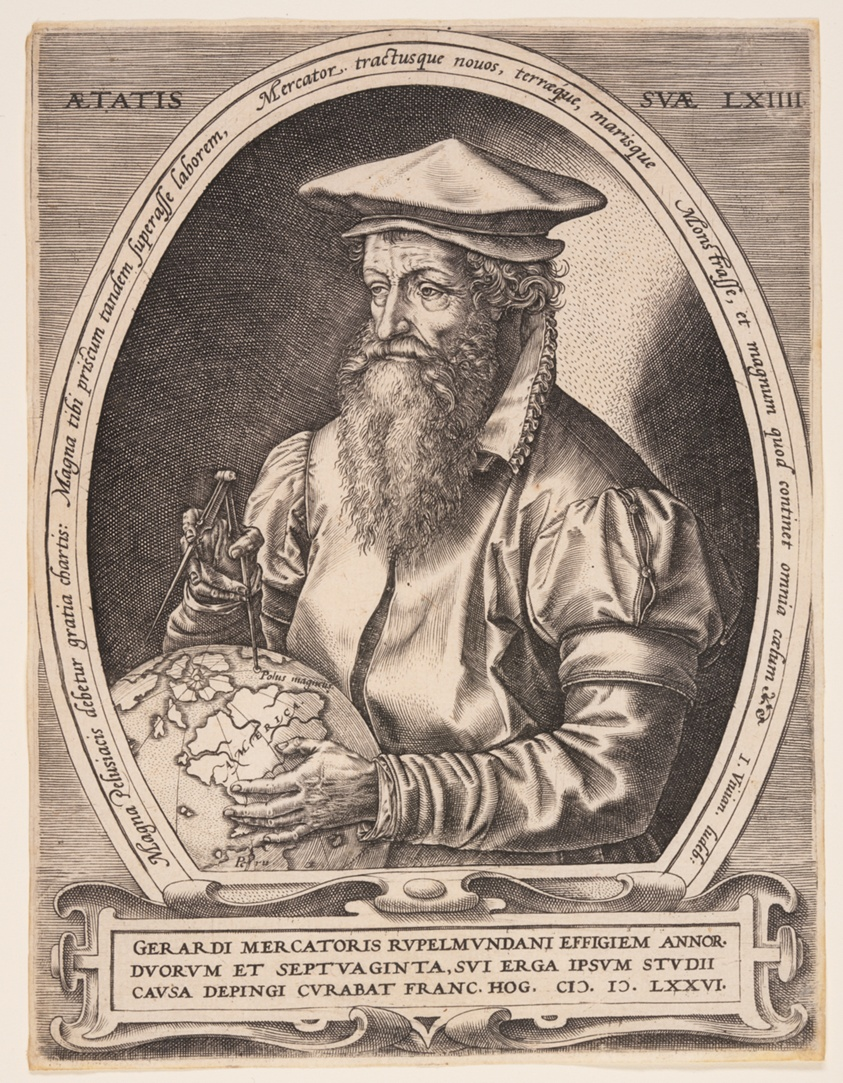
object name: Print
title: Gerardus Mercator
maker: Attributed to Hendrick Goltzius; Dutch, 1558–1617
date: 1576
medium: Engraving on laid paper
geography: Netherlands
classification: engraving; paper; print; prints and drawing